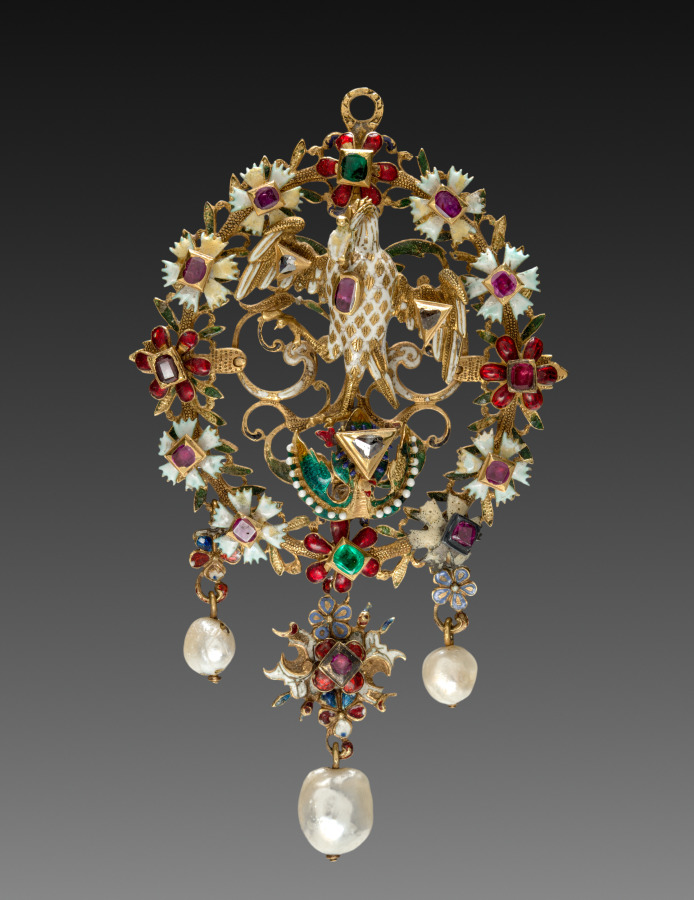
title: Pendant with Pelican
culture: Germany, early 17th century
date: c. 1600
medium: enameled gold with rubies, emeralds, diamonds, and pearls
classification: Jewelry